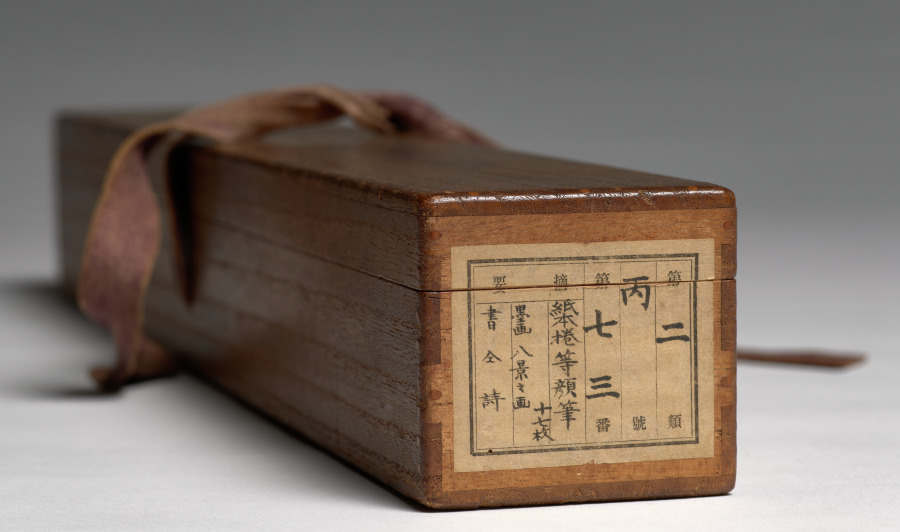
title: Poems and Pictures of the Eight Views of Xiao-Xiang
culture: Japan, Momoyama period (1573–1615)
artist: Unkoku Tōgan (Japanese, 1547–1618)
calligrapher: Inkei Gentetsu (Japanese, 1562–1612)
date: 1605–12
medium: Handscroll; ink on paper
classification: Painting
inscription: Each painting sealed with red gourd-shaped seal reading Unkoku (雲谷) and a square seal reading Tōgan (等顔).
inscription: Each painting prefaced with a titled poem on the Eight Views of Xiao-Xiang by Yujian Ruofen (active late 13th century) inscribed by Japanese Buddhist monk Inkei Gentetsu (1562–1612).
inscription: 右寫玉㵎之筆勢／雪舟末葉等顔筆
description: Unkoku Tōgan brushed these scenes using the splashed-ink technique associated in Japan with the Chinese monk Yujian Ruofen (active late 1200s). Xiao-Xiang refers to the region in present-day Hunan province, where the Xiang River and its tributaries converge. Each of the eight views evokes a time of day or season. The earliest surviving series of Xiao-Xiang paintings is by Wang Hong (active mid-1100s), but textual evidence tells us the theme appears earlier. It was later adopted in Japan and Korea, as seen here. The poems were inscribed by Inkei Gentetsu, the third abbot of the Rinzai Zen temple Tōshunji, Japan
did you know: The “Tō” of Tōgan comes from the name of painter Sesshū Tōyō (1420–1506).